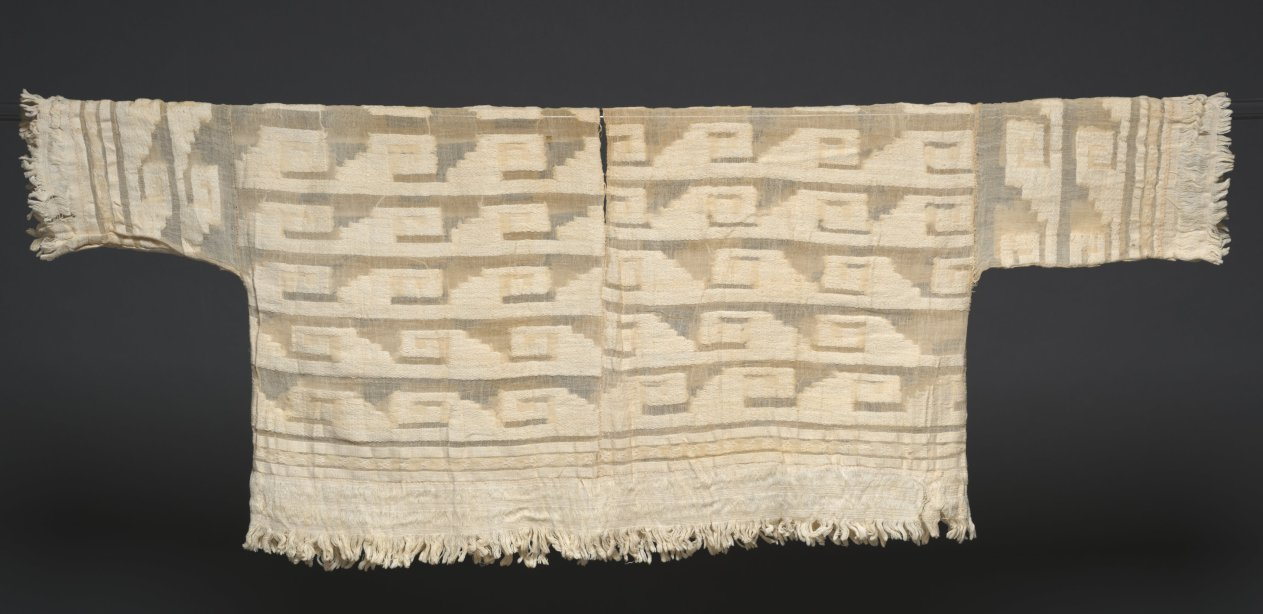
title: Tunic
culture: Peru, Chimú or Chimú-Inka, 12th-16th century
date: 1100–1532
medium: white cotton; plain weave with supplementary weft brocading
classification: Textile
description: This garment embodies an important principle of the Chimú textile aesthetic: a love of combining different textures, some dense and sculptural and others so open and airy they are nearly invisible. (The hand-spun yarns are only .1 to .2 millimeters in diameter.) It also elegantly articulates the simplified, spare visual vocabulary that the Chimú favored, here geometric motifs.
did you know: The Chimú forged an empire that thrived until the 1460s, when the Inka incorporated it into their own imperial domain.